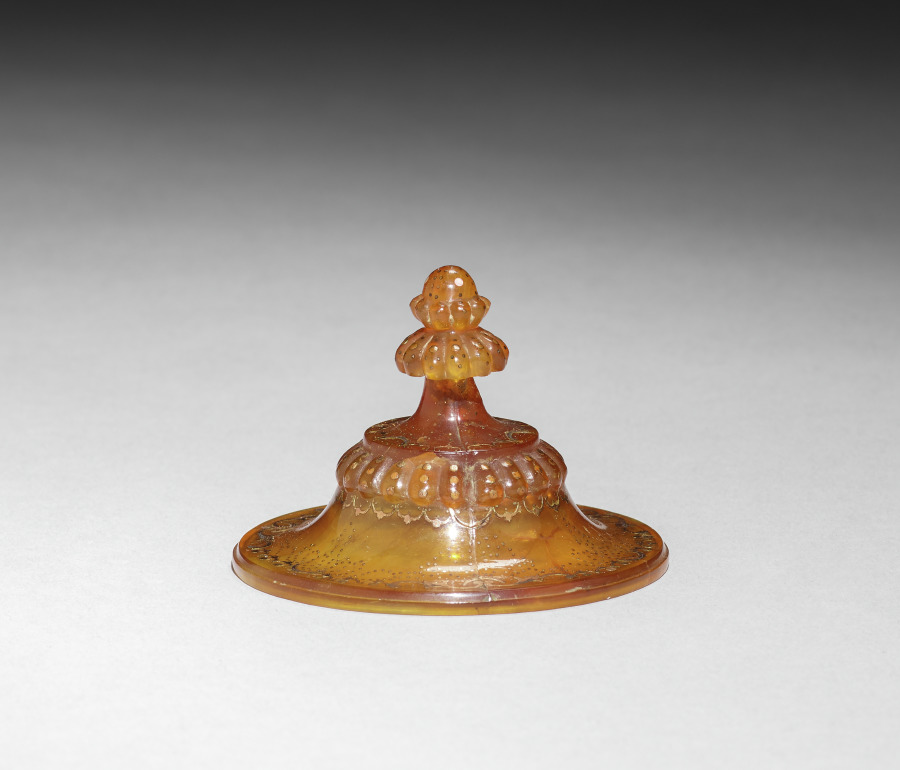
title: Cover for a Cup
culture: France, 18th century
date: c. 1730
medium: amber decorated with inlaid gold and mother-of-pearl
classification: Miscellaneous